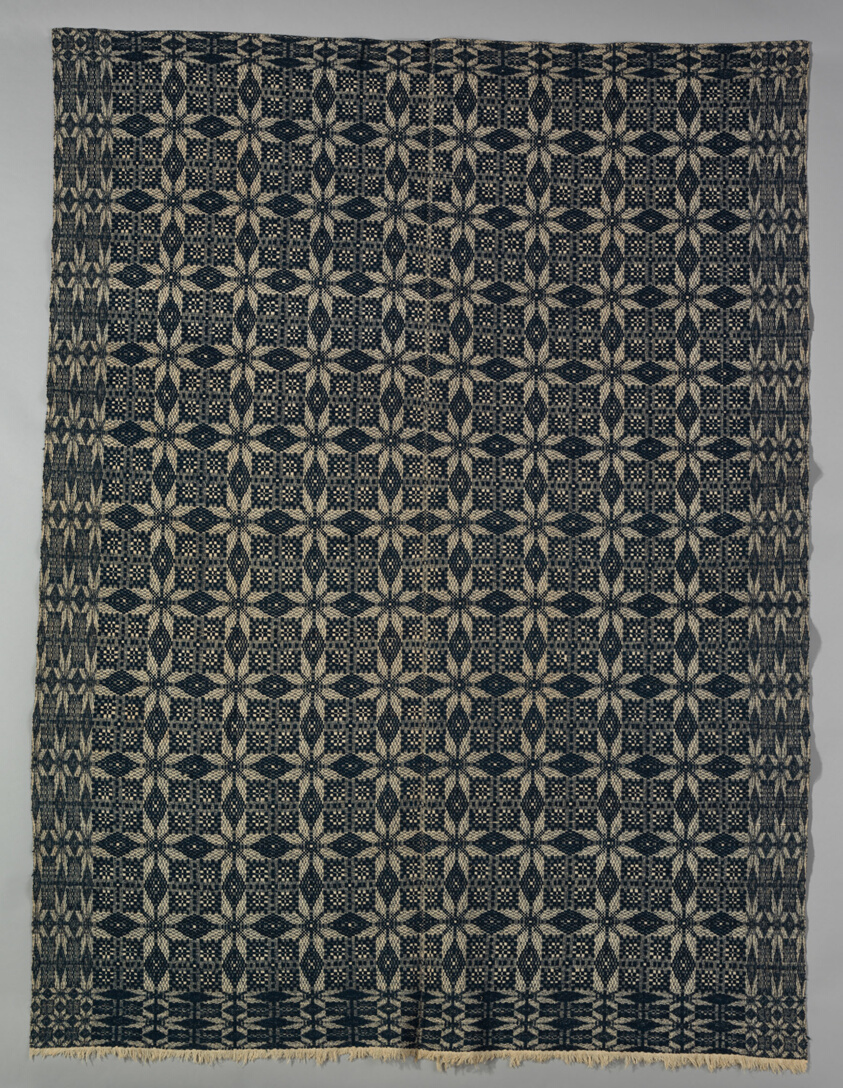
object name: Textile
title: Coverlet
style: American Fancy, Star work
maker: United States, Probably Pennsylvania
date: 1820-40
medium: Cotton and wool, plain weave with supplementary wefts in composite point twill weave (star, work, multiple shaft); two loom widths joined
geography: Pennsylvania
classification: weaving - coverlet; coverlet; weaving; textile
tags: stars, coverlet, geometric motif, squares, star work